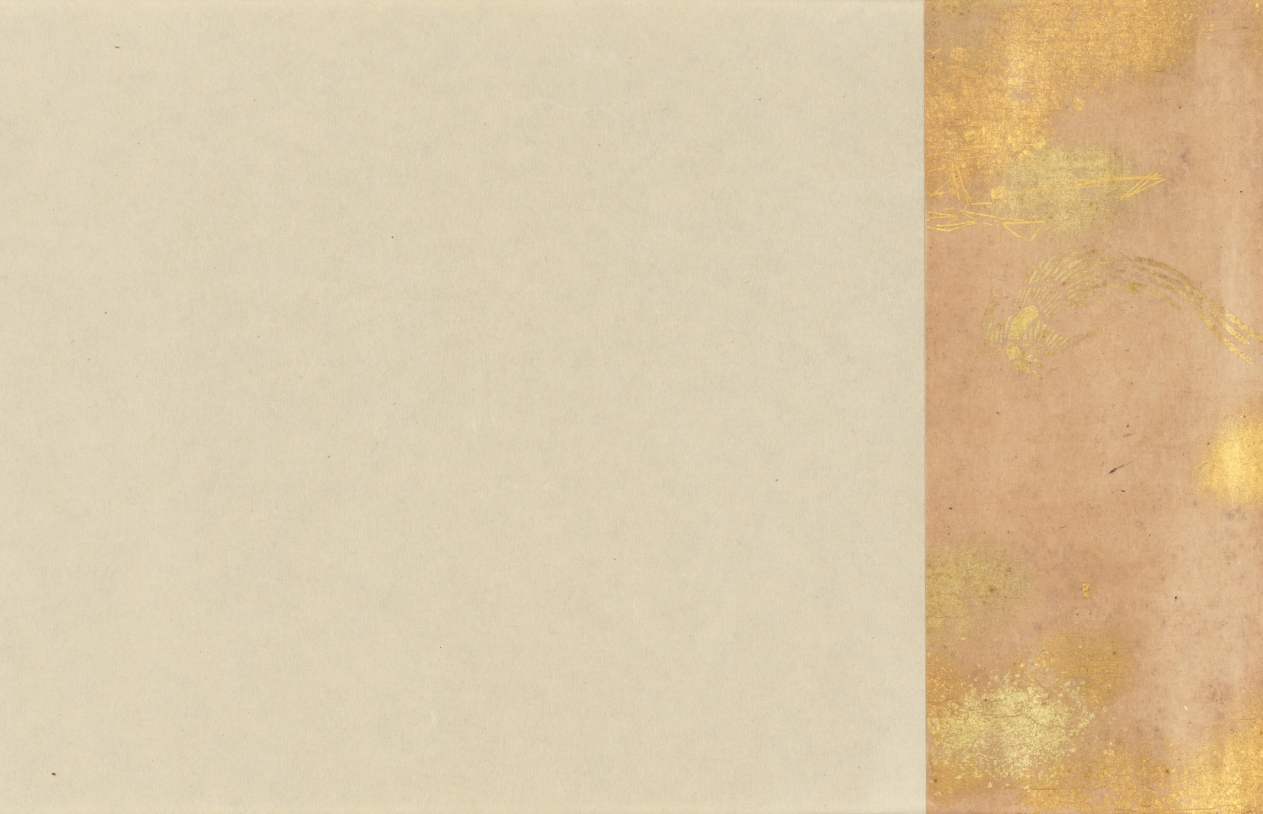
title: Eight Views of Xiao-Xiang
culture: Japan, Muromachi period (1392–1573)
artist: Sesson Shūkei (Japanese, c. 1492–c. 1577)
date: 1500s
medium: handscroll; ink on paper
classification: Painting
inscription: Signature and seal of artist at end of painting.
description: Eight Views of the Xiao and Xiang Rivers can be traced to 11th-century Chinese poems and paintings, the depiction of which had also become popular among Korean and Japanese painters. Xiao-Xiang refers to the region in present-day Hunan province where the Xiao and Xiang rivers converge. Few painters of the Eight Views had in fact seen the scenery; rather, they were trying to portray in ink and wash the lyrical qualities of dim light and a misty atmosphere typical of that region. Each of the poetic titles suggests a time of day, a season, or specific atmospheric conditions—subjects that challenged the abilities of the most talented artists. In this miniature painting (shukuzu) of the Muromachi period, Japanese Zen monk and painter Shukei Sesson depicted all eight views featured in Chinese prototypes: Wild Geese Descending to Sandbar; Returning Sails Off a Distant Coast; Mountain Market in Clearing Mist; River and Sky in Evening Snow; Autumn Moon over Dongting Lake; Night Rain on the Xiao and Xiang; Evening Bell from Mist-Shrouded Temple; and Fishing Village in Evening Glow.